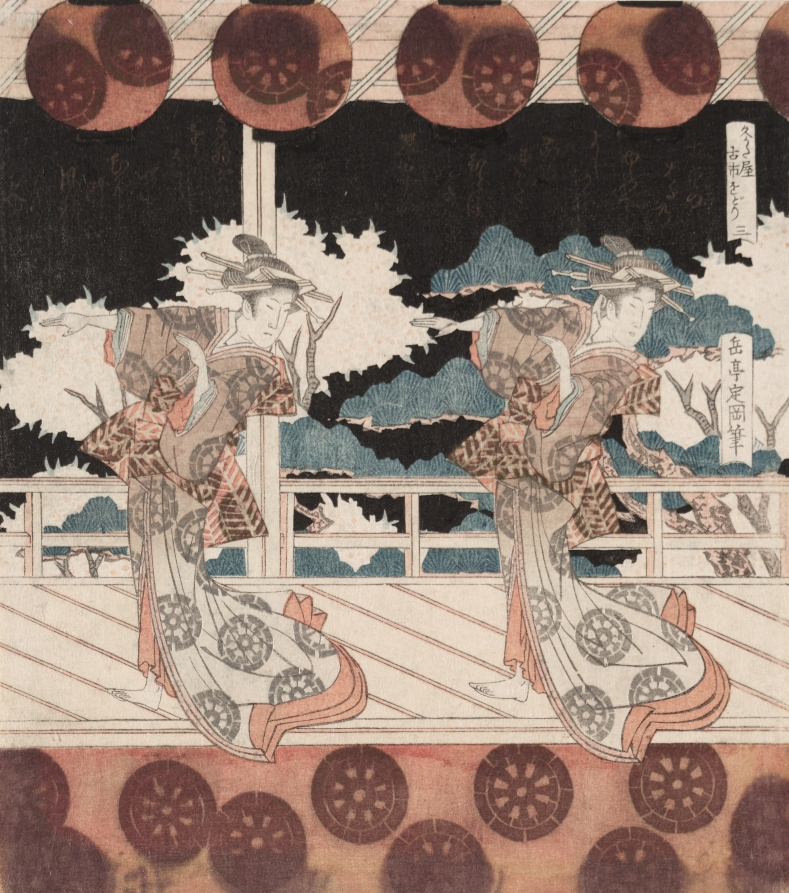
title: Furuichi Dance at the Hisagataya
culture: Japan, Edo period (1615–1868)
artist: Gakutei Harunobu (Japanese, 1786(?)–1868)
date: mid 1820s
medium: Third of a pentaptych of woodblock prints; ink and color on paper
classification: Print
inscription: Signature: Gakutei Sadaoka hitsu